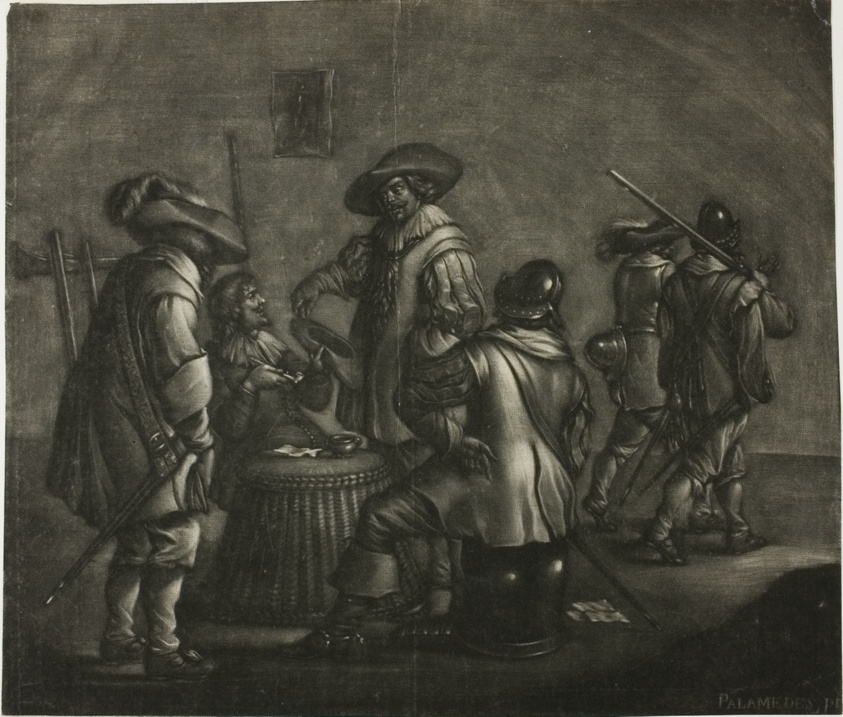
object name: Print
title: Group of Six Soldiers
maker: Wallerant Vaillant; Dutch, 1623-1677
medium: Mezzotint on ivory paper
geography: Flanders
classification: mezzotint; print; prints and drawing